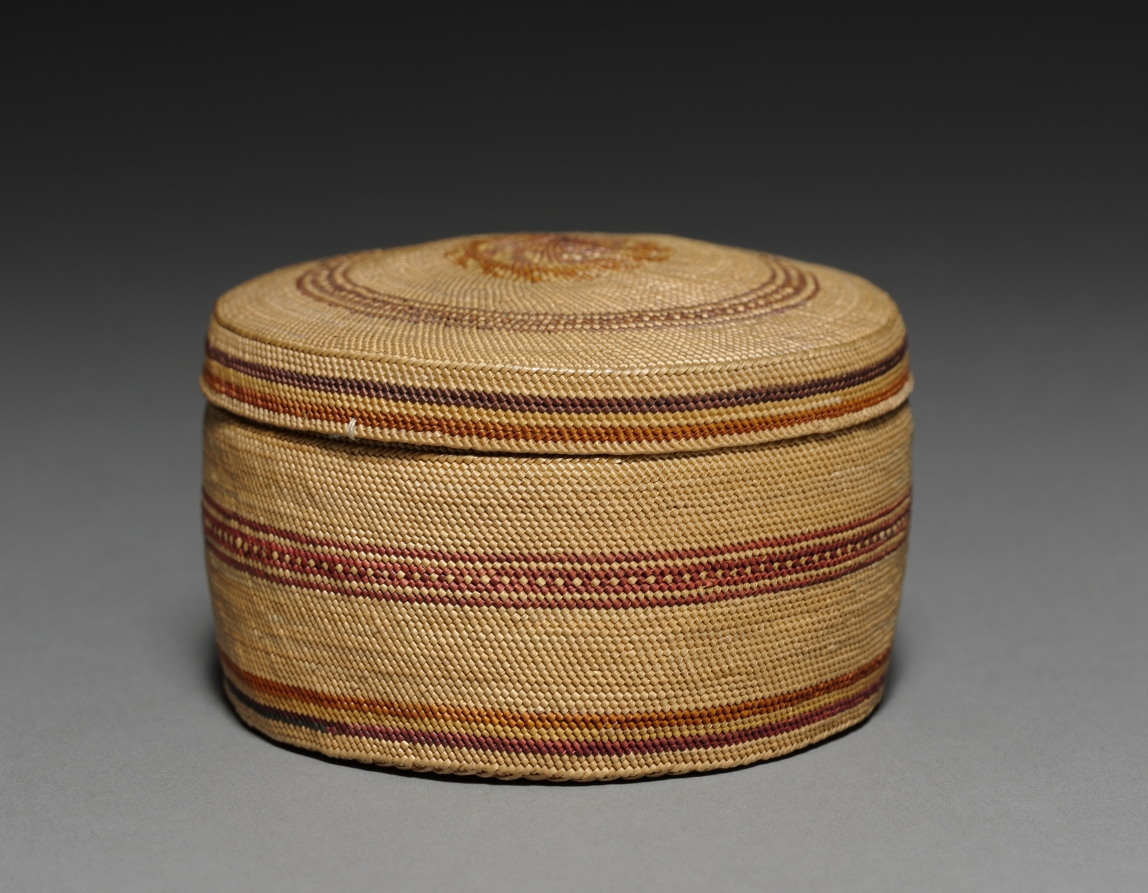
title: Lidded Bowl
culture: Northwest Coast, Makah, late 19th century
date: c 1900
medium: Cedar bark, deer grass; wrapped twining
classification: Basketry